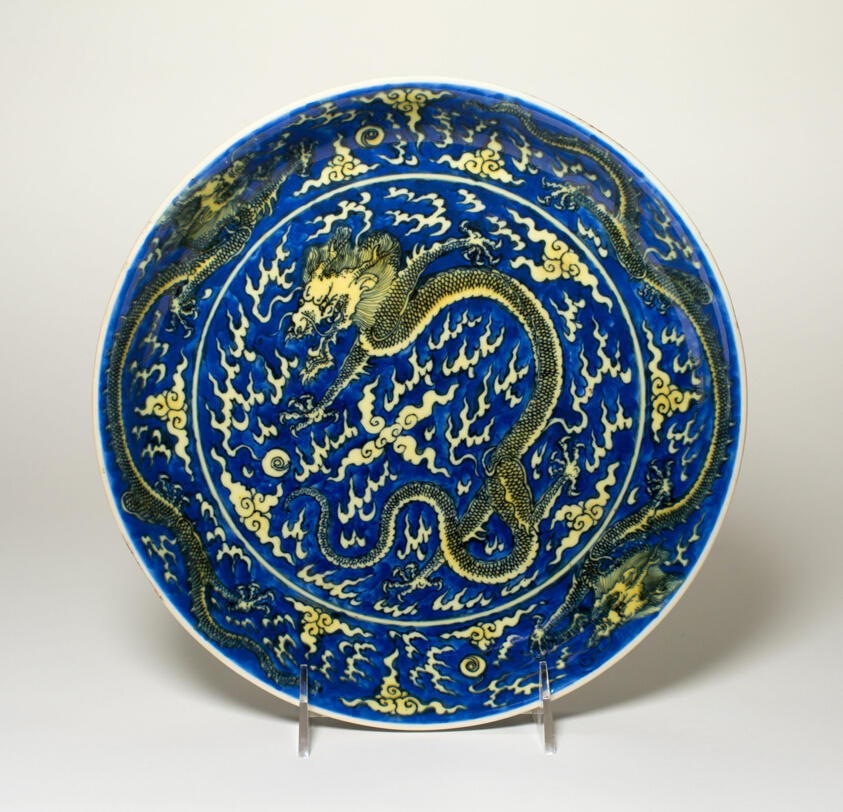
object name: Vessel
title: Dish with Dragons amid Clouds, Chasing Flaming Pearls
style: Chinese (culture or style)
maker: China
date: Qing dynasty (1644–1911), Kangxi reign mark and period (1662–1722)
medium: Porcelain painted in underglaze blue and overglaze yellow enamel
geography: China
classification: dish (vessel); porcelain; asian art; ceramics; vessel